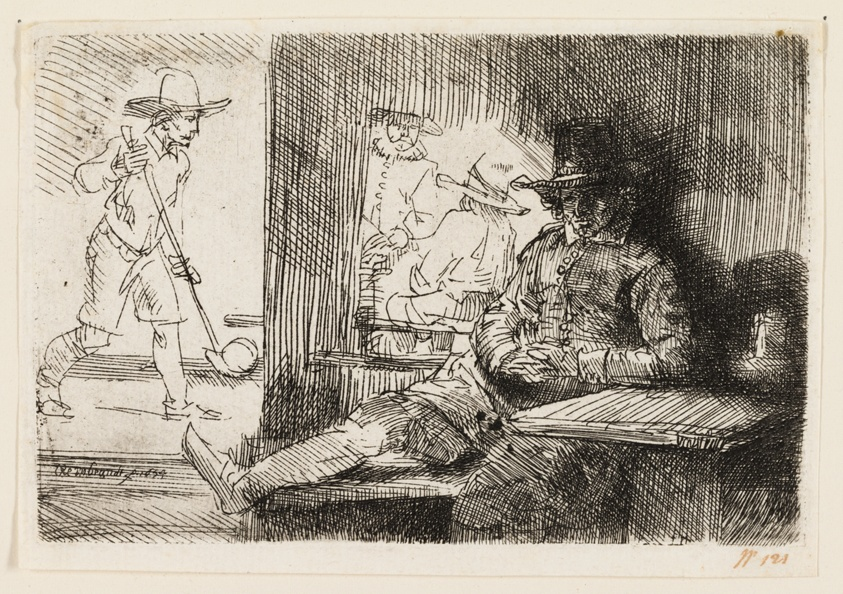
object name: Print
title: The Ringball Player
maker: Rembrandt van Rijn (Dutch, 1606-1669)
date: 1654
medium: Etching on ivory laid paper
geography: Holland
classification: etching; print; prints and drawing; paper